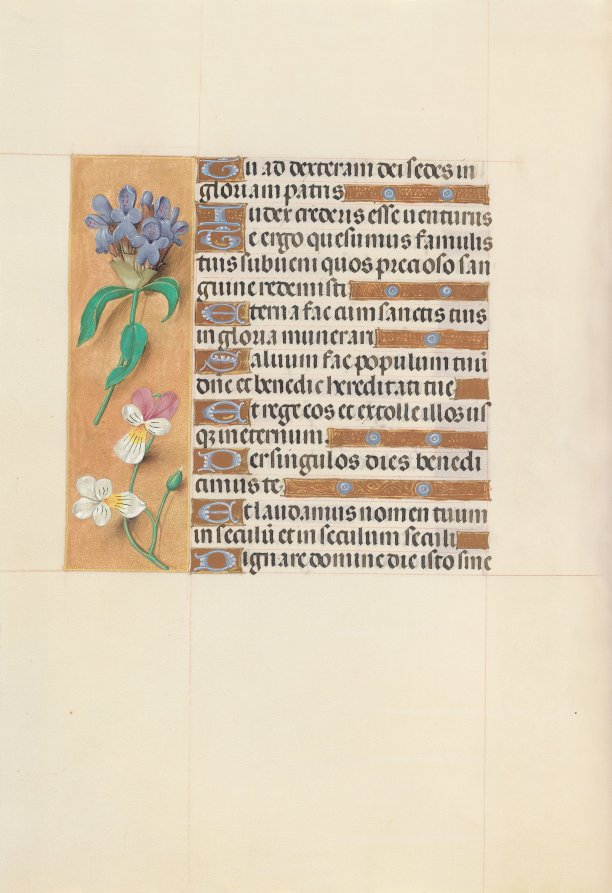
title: Hours of Queen Isabella the Catholic, Queen of Spain: Fol. 113v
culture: Flanders, Ghent and Bruges, late 15th century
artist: Master of the First Prayerbook of Maximillian (Flemish, c. 1444–1519)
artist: and Associates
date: c. 1500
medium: ink, tempera, and gold on vellum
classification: Bound Volume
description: This manuscript was illuminated by a circle of at least five highly organized manuscript painters active in the Flemish cities of Ghent and Bruges. The principal illuminator was Alexander Bening, who painted the majority of the book's miniatures. Manuscripts produced by this circle of artists are renowned for the decoration of their borders, which typically feature a rich variety of realistically-painted flowers, birds, and butterflies. This prayer book, called a book of hours, was intended not for a cleric, but for the private devotions of a lay person-in this case, Isabella the Catholic, Queen of Spain (1451-1504). Isabella's coat of arms embellishes the book's frontispiece. It is unlikely that the book was commissioned by the Queen herself; rather, she probably received it as a diplomatic gift from someone courting her patronage, perhaps Cardinal Francisco Jimenez de Cisneros. A Franciscan friar, Jimenez was dependent upon Isabella for his advancement, first to the post of Queen's confessor in 1492, and then to Archbishop of Toledo in 1495.